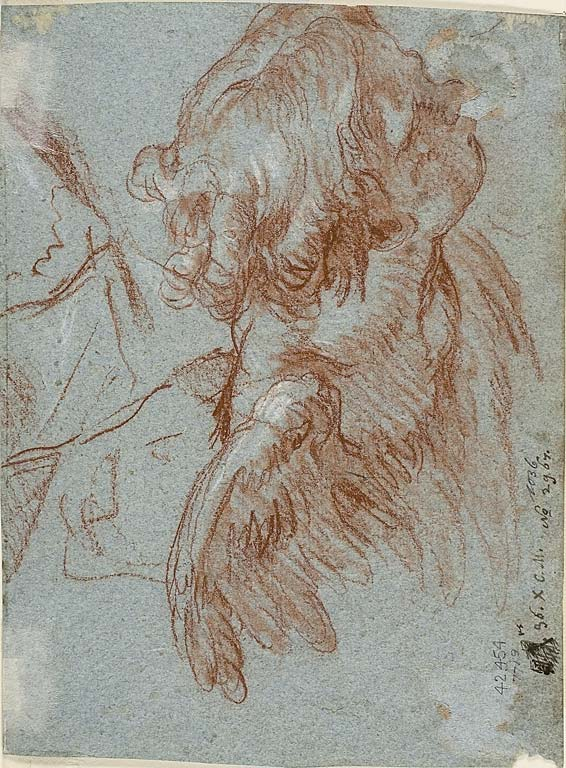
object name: Drawing and Watercolor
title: Study for Detail: Head of a Cherub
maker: Attributed to Giovanni Battista Tiepolo; Italian, 1696–1770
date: 1750/59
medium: Red chalk, heightened with touches of white chalk, on blue laid paper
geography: Italy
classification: drawings (visual works); prints and drawing